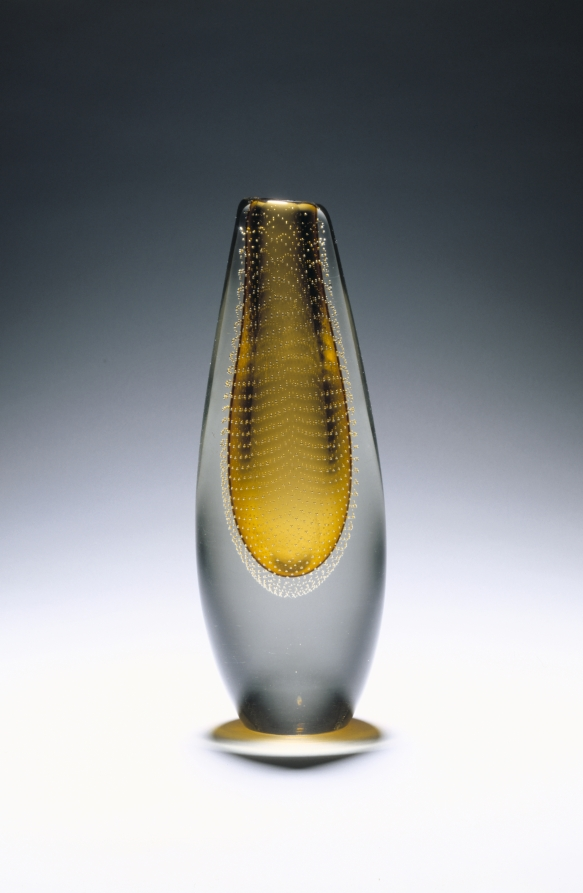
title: Vase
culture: Finland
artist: Gunnel Nyman (Finnish, 1909–1948)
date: 1950s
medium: glass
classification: Glass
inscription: inscribed on bottom: NYMAN/NUUTAJARVI/NOTSJO-(3?)(9?).